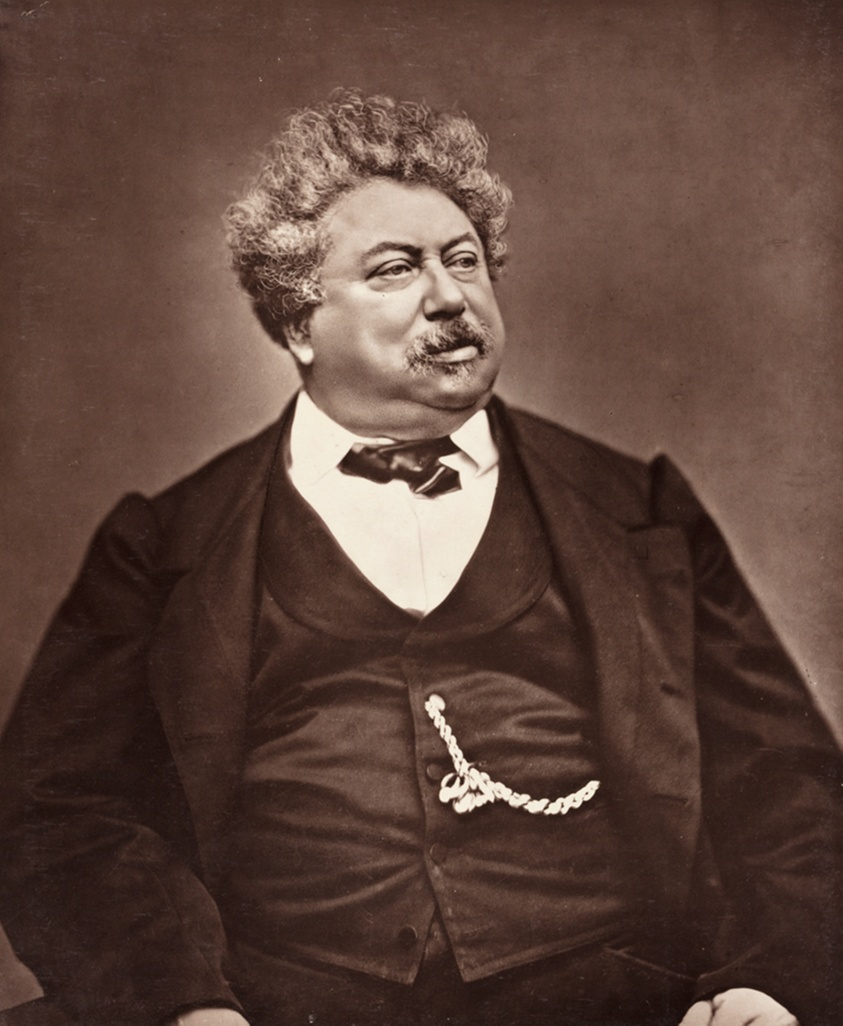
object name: Photograph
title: Alexandre Dumas (French novelist and playwright, 1802-1870)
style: 19th century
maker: Étienne Carjat; French, 1828–1906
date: c. 1876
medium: Woodburytype, from the periodical “Galerie Contemporaine Littéraire, Artistique” (1878), volume 5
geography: France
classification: woodburytype; photomechanical process; photography; photograph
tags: Collected by Hugh Edwards, Contemporaine Littéraire